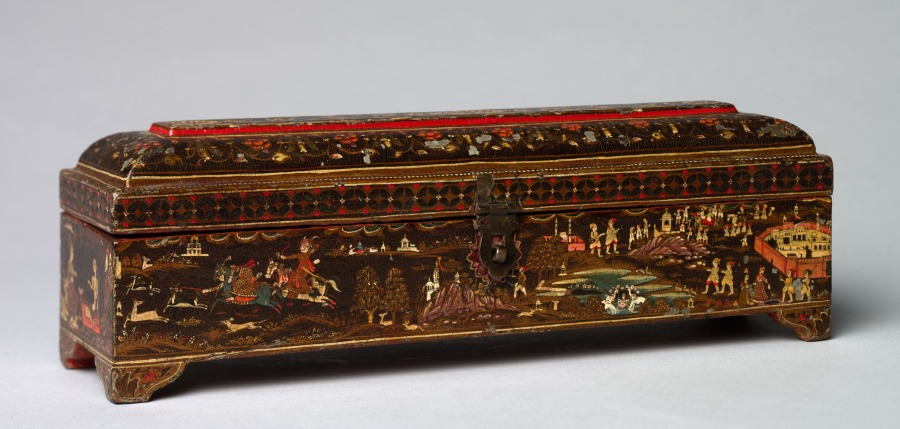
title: Rajput Box with Various Scenes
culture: India, Rajasthan, early 19th Century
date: c. 1800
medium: painted wood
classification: Painting